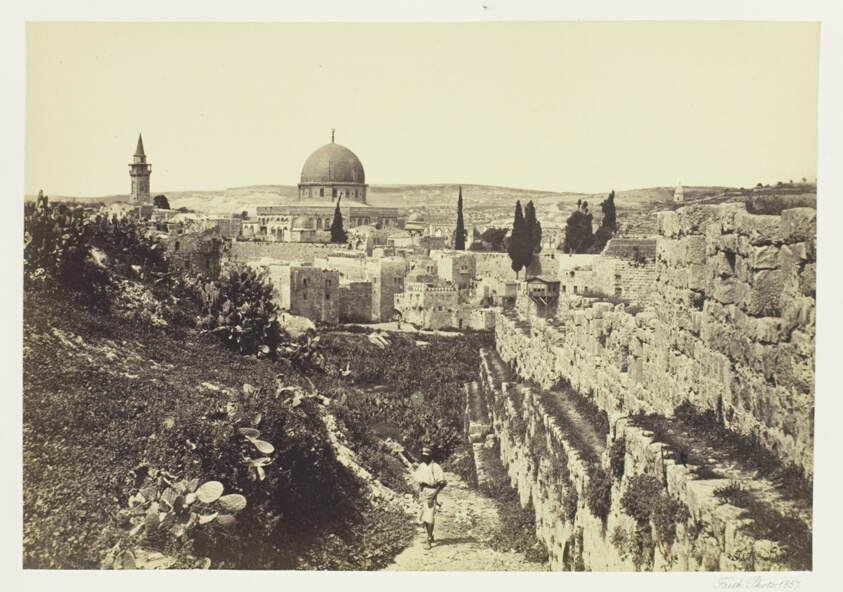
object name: Photograph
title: City Wall and Mosque of Omar, Jerusalem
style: 19th century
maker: Francis Frith (English, 1822–1898)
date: 1857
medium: Albumen print, pl. 28 from the album "Egypt and Palestine, Volume I" (1858)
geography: England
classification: photograph; albumen silver print; photography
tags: Collected by Hugh Edwards, Egypt and Palestine